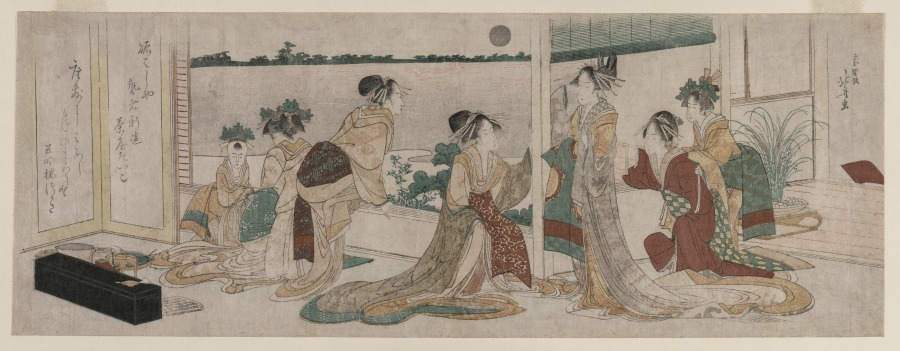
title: Tsukasa and Other Courtesans of the Ogiya Watching the Autumn Moon Rise Over Rice Fields from a Balcony in the Yoshiwara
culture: Japan, Edo period (1615–1868)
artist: Katsushika Hokusai (Japanese, 1760–1849)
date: 1799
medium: Surimono; color woodblock print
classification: Print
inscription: Signature: Sori aratame Hokusai ga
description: Gomeirō is another name for the fashionable teahouse Ōgi-ya (House of Fans) in the Yoshiwara district of Edo (present-day Tokyo). Two courtesans, each attended by a geisha and a shinzō (apprentice to a courtesan) view a full autumn moon as it rises over the surrounding paddy fields. The elegance of the women's flowing robes and the serenity of the evening with a full silver moon contribute to the poetic atmosphere of this surimono, a privately commissioned print usually accompanied by text—here, a poem, which reads: What liveliness! Geisha, shinzō, and jesters fill the room, all guests of the moon.